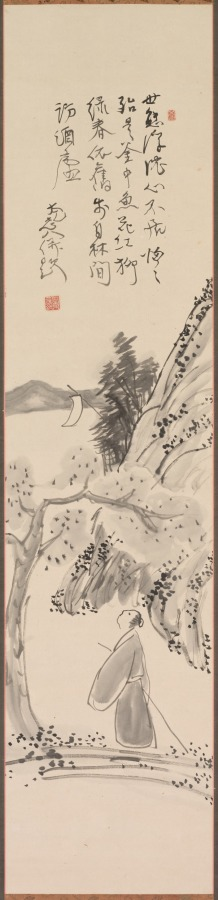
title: Casually Created on a Spring Day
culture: Japan, Edo period (1615–1868) to Meiji period (1868–1912)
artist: Murase Taiitsu (Japanese, 1803–1881)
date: c. 1825–81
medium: hanging scroll; ink on paper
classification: Painting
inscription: artist's inscription, signature, and seal at top of painting.